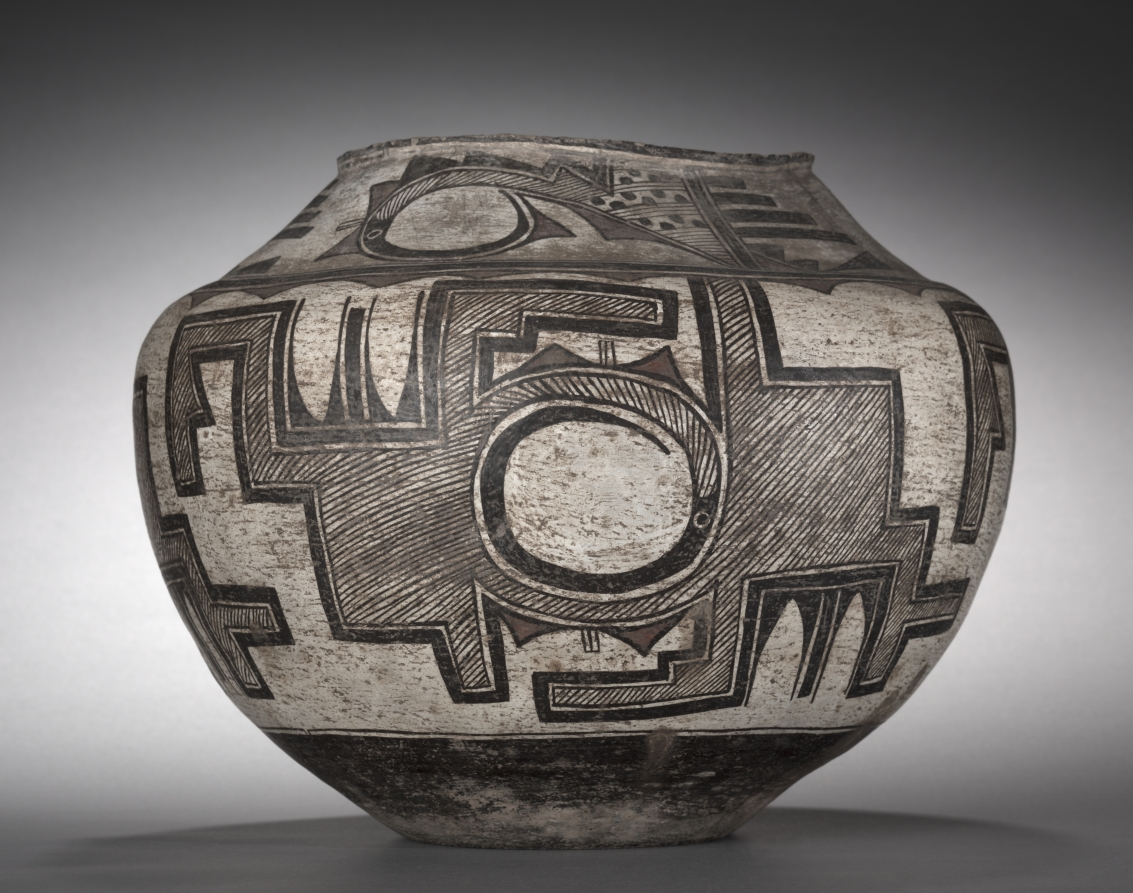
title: Water Jar (Olla) with Rainbird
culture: Native North America, Southwest, New Mexico, Zuni (A:shiwi) Pueblo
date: 1850–60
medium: ceramic, slip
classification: Ceramic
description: Zuni (A:shiwi) women used ollas (oy-ahs) like this one to collect, carry, and store water. The water well was a place for socializing, and the vessels’ public visibility may help to explain their elaborate, deftly painted decoration—here an abstract creature called the Rainbird whose beak spirals between two stylized, stepped wings that may allude to moisture-bearing clouds. Milford Nahohai, the contemporary Zuni potter, believes the motif is inspired by rain clouds that roll into the Zuni River Valley, their leading edges curled under the main mass to form a curve like that of the beak.